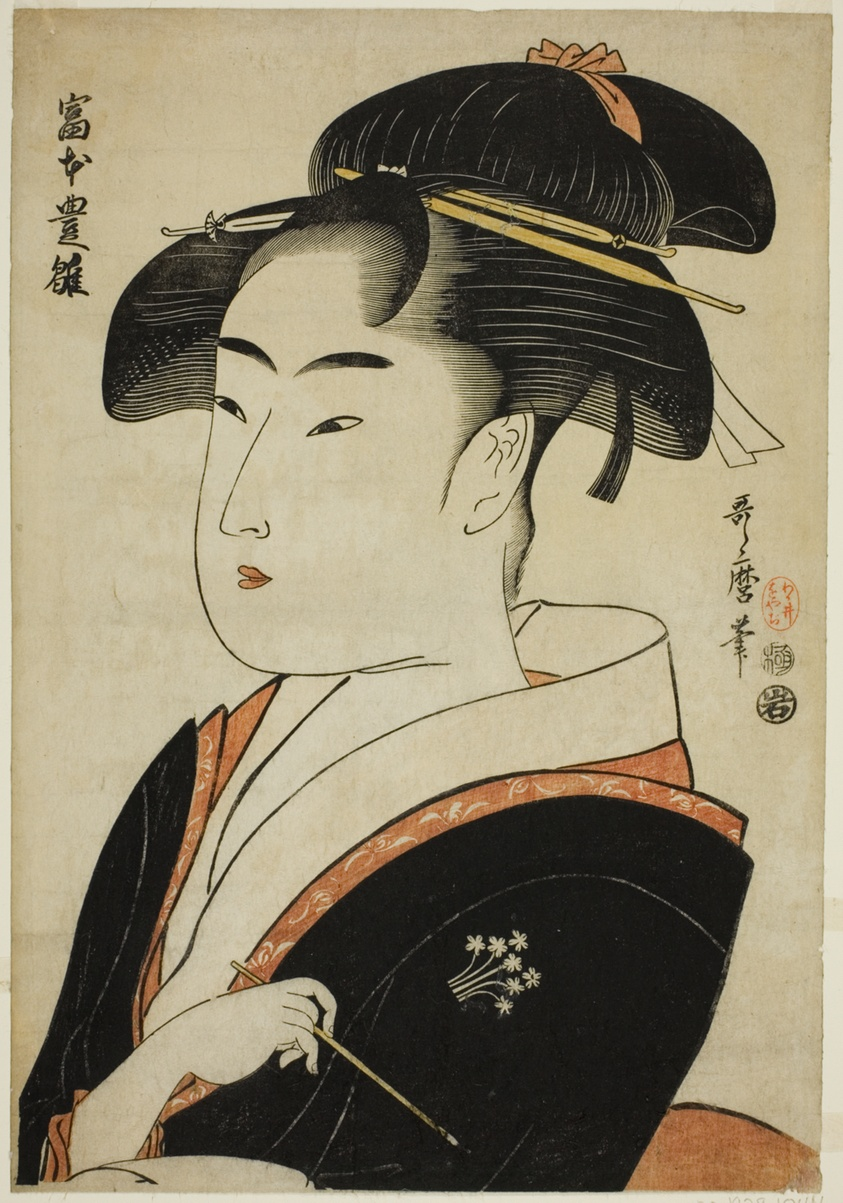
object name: Print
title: Tomimoto Toyohina, from the series "Famous Beauties of Edo (Edo komei bijin)"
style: Japanese (culture or style)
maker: Kitagawa Utamaro 喜多川 歌麿; Japanese, 1753 (?)-1806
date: c. 1793/94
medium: Color woodblock print; aiban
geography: Japan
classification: woodblock print; print; asian art